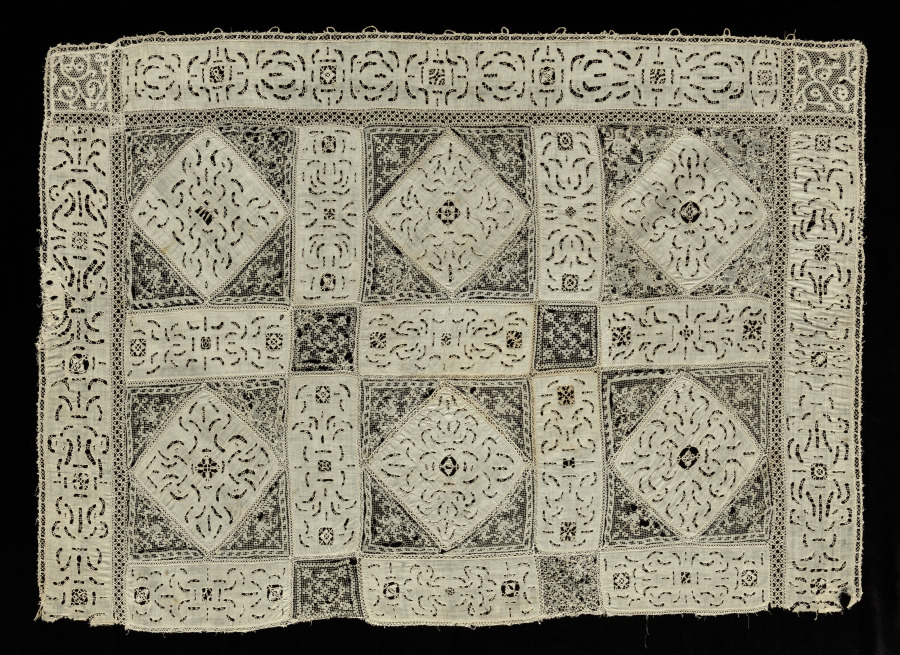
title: Fragment of Lace Cloth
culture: Italy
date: 1600–1799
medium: Linen: needle lace (cutwork and darned netting) and bobbin lace (Milanese)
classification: Lace